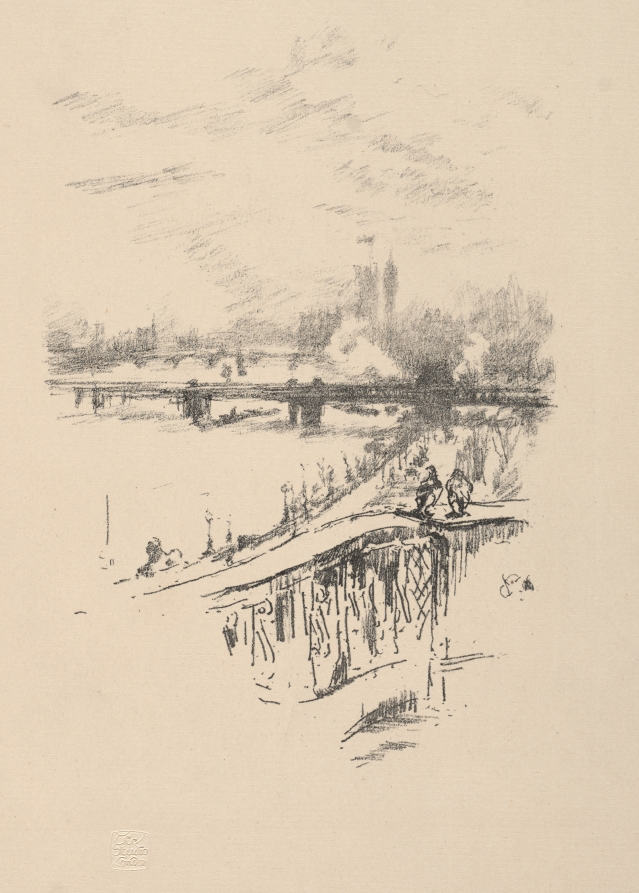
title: Savoy Pigeons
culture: America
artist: James McNeill Whistler (American, 1834–1903)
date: 1896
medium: lithograph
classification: Print